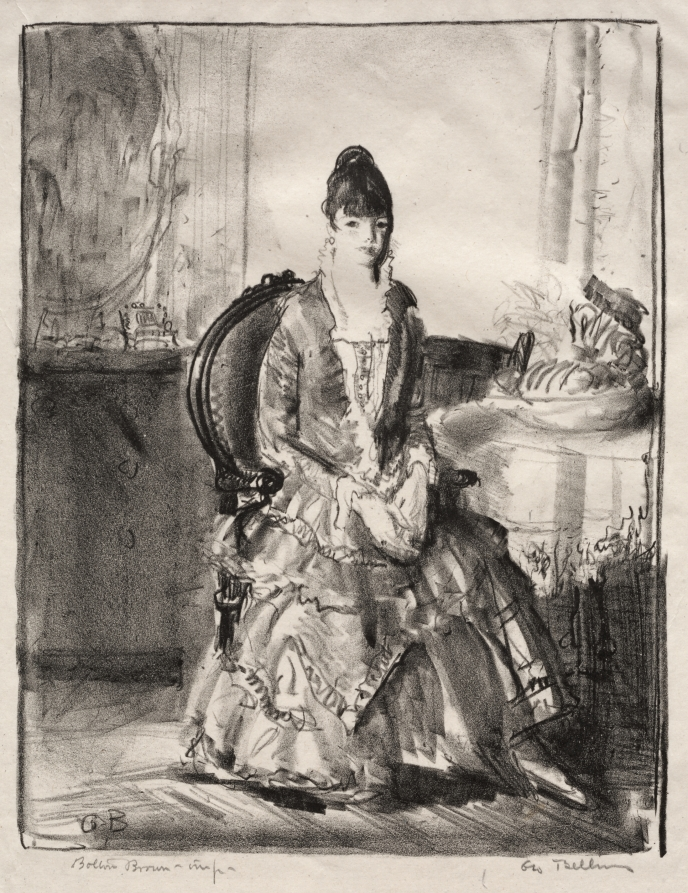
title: Arrangement, Emma in a Room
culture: America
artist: George Bellows (American, 1882–1925)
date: 1921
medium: lithograph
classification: Print